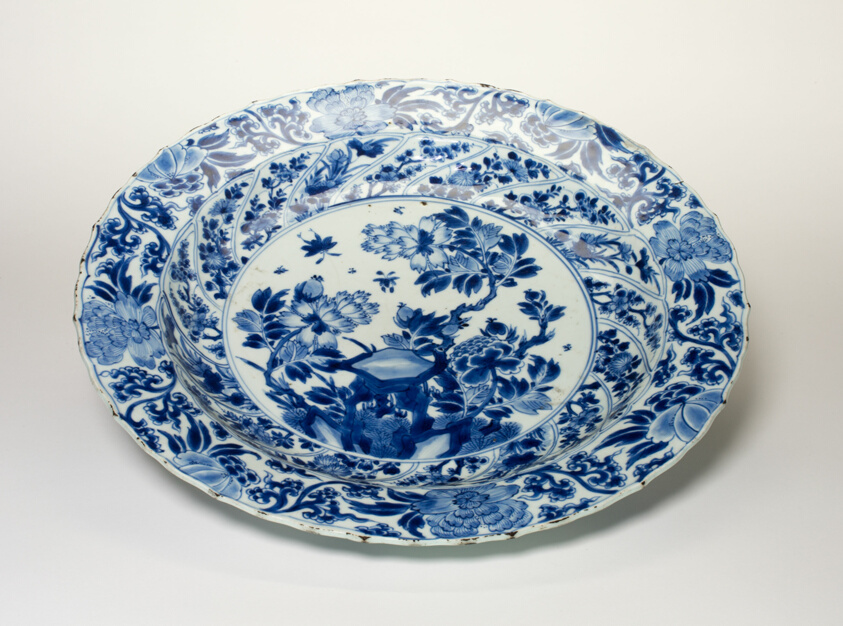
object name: Vessel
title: Deep Dish with Peony, Pine Branches, Plum Blossoms, Chrysanthemum, Cherry, and Lotus Flowers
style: Chinese (culture or style)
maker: China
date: Qing dynasty (1644–1911), 19th century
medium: Porcelain painted in underglaze blue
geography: China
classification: dish (vessel); porcelain; asian art; ceramics; vessel